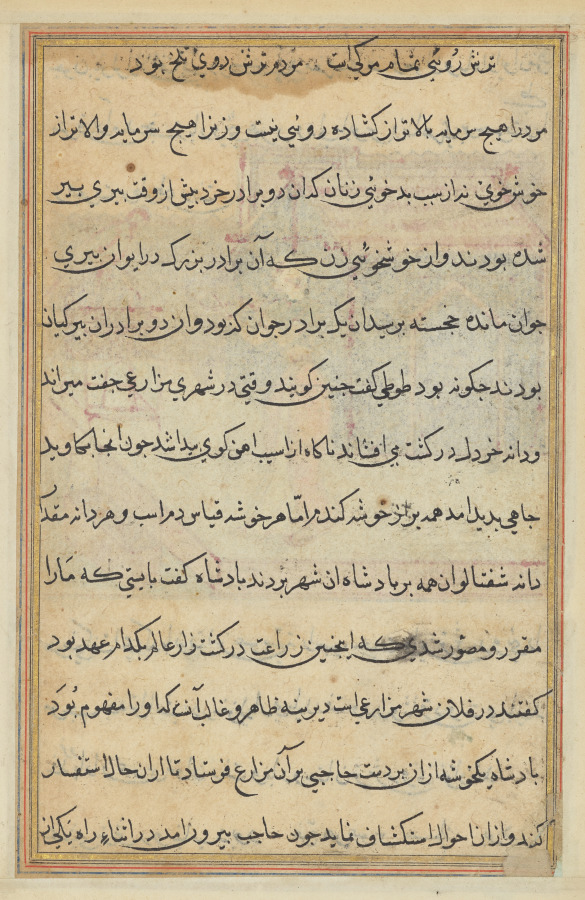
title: Page from Tales of a Parrot (Tuti-nama): text page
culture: Mughal India, court of Akbar (reigned 1556–1605)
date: c. 1560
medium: gum tempera, ink, and gold on paper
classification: Painting